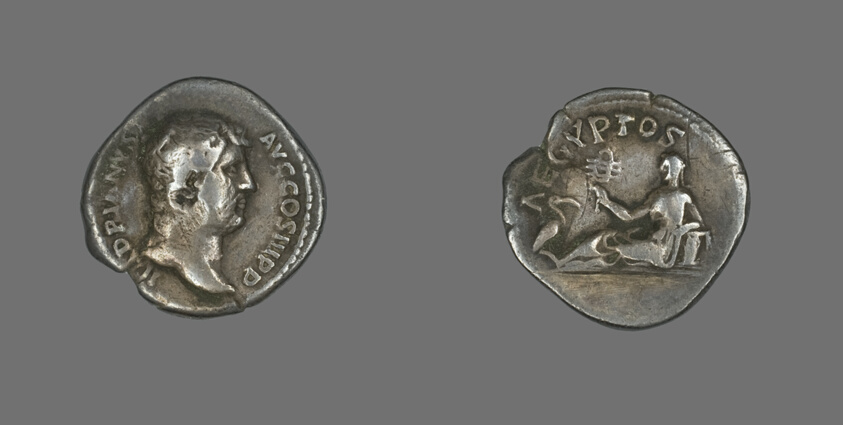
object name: Coin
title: Denarius (Coin) Portraying Emperor Hadrian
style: roman (ancient, style or period), ancient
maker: Roman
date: 134-138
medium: Silver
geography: Roman Empire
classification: coin; ancient art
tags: portrait